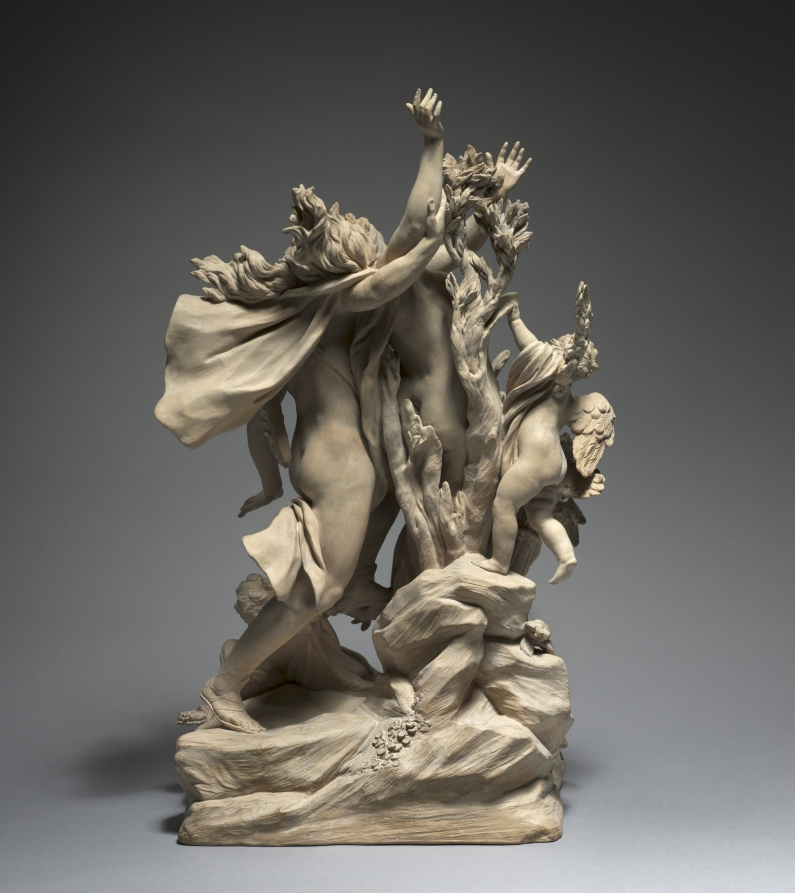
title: Apollo and Daphne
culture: Italy, Florence, 17th century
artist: Massimiliano Soldani (Italian, 1656–1740)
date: c. 1700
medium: terracotta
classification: Sculpture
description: Apollo, the Greek and Roman god of the sun and the arts, fell in love with the nymph Daphne. Chased to a riverbank, Daphne prayed to her father, the river god, Peneus, for help. At the moment Apollo reached out to touch her, she transformed into a laurel tree, branches and roots sprouting from her body. This work reveals key preoccupations of artists working in Italy in the 1600s: novel, active compositions; fleeting moments; and transformation from one physical form into another. Soldani based this work on a large-scale marble sculpture from 1622–25 by the Roman artist Gian Lorenzo Bernini.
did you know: Soldani shows Daphne in the process of turning into a tree to escape the persistent Apollo.